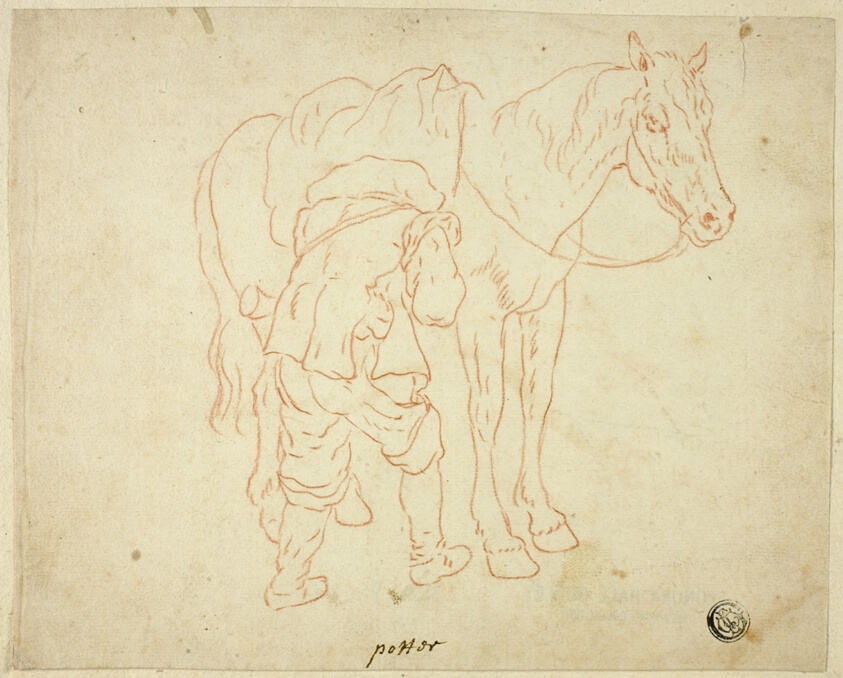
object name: Drawing and Watercolor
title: Man Adjusting Saddle on Horse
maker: Possibly after Paulus Potter; Dutch, 1625-1654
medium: Red chalk, on ivory laid paper, tipped onto ivory laid paper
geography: Holland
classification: chalk; drawings (visual works); prints and drawing